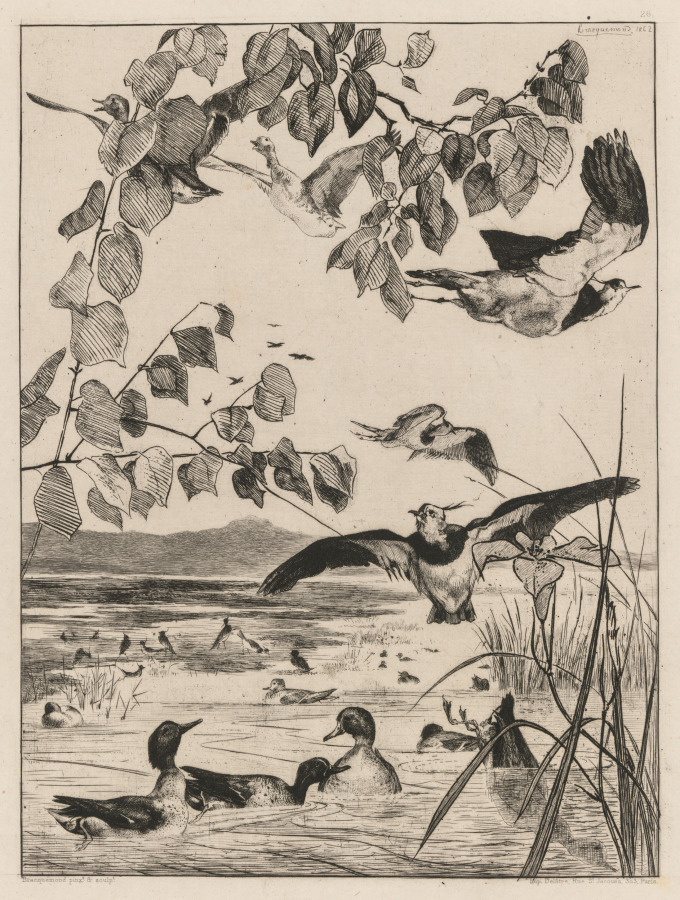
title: Lapwings and Teals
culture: France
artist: Félix Bracquemond (French, 1833–1914)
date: 1862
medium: etching on laid paper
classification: Print